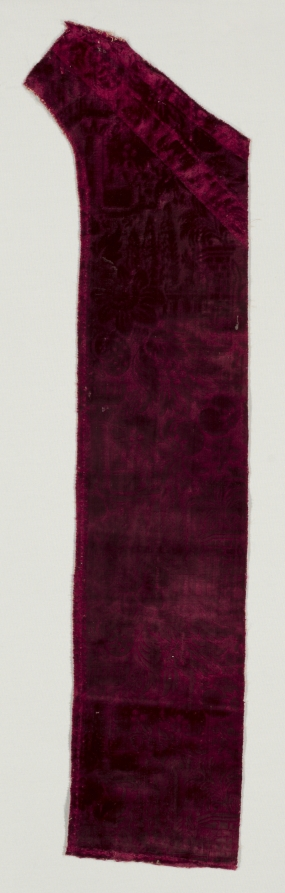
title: Fragments of a Chasuble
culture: Italy, 17th century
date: 1600s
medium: velvet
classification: Velvet